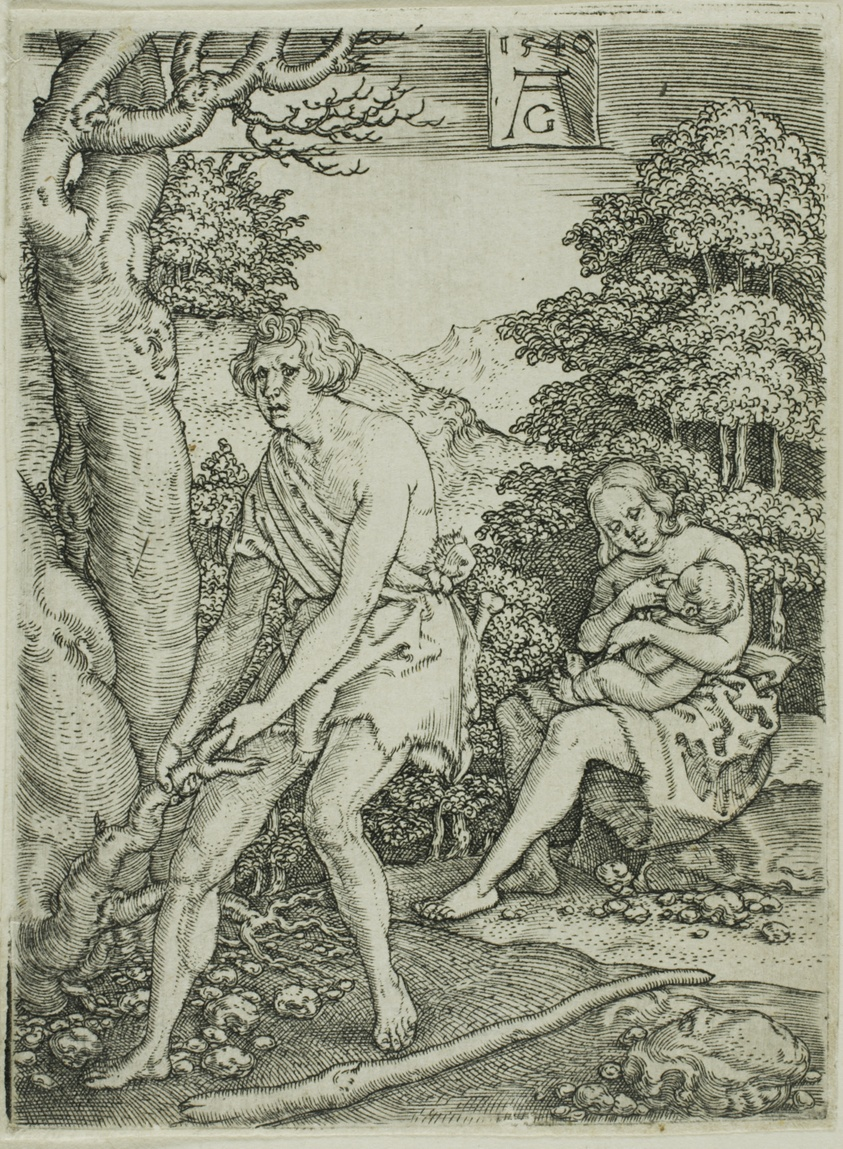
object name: Print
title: Adam and Eve at Work, from The Story of Adam and Eve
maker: Heinrich Aldegrever (German, 1502-c. 1560)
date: 1540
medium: Engraving in black on ivory laid paper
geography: Germany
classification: engraving; print; prints and drawing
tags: labor, work